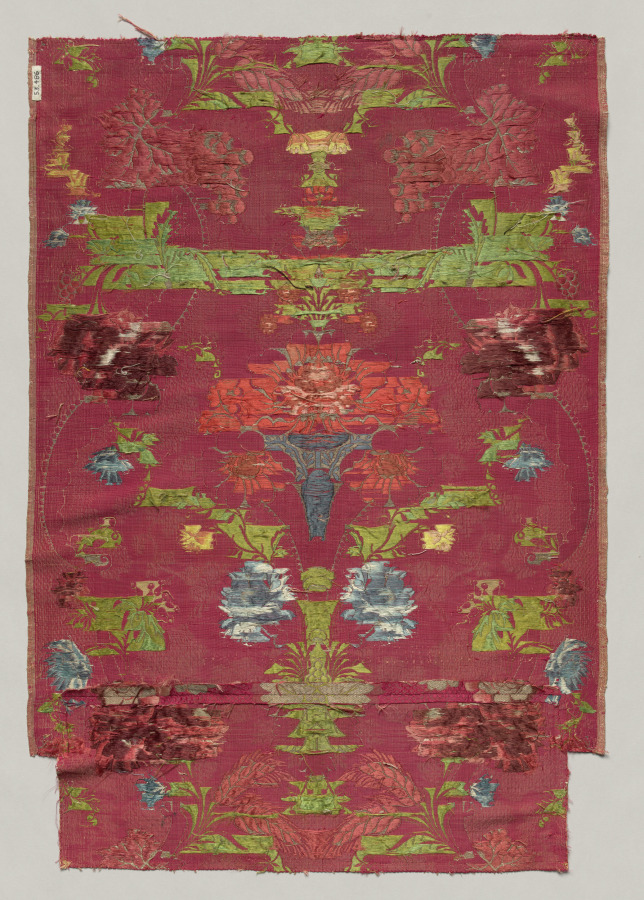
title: Silk Fragment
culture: Spain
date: 1700s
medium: plain compound cloth, brocaded; silk and metal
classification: Textile